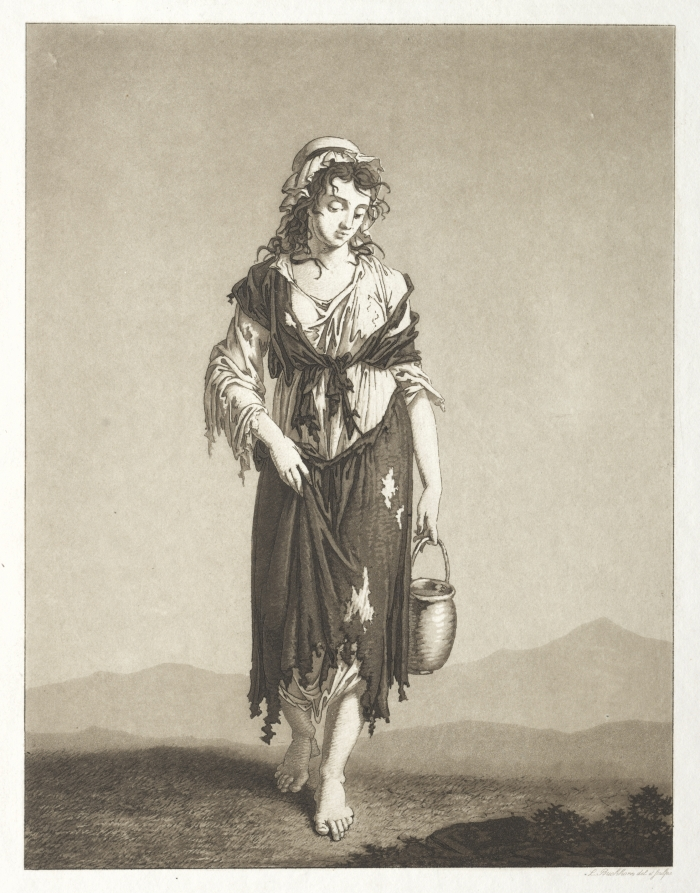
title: The Young Beggars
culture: Germany, late 18th-early 19th century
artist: Karl Ludwig Bernhard Buchhorn (German, 1770–1856)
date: c. 1800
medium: aquatint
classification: Print